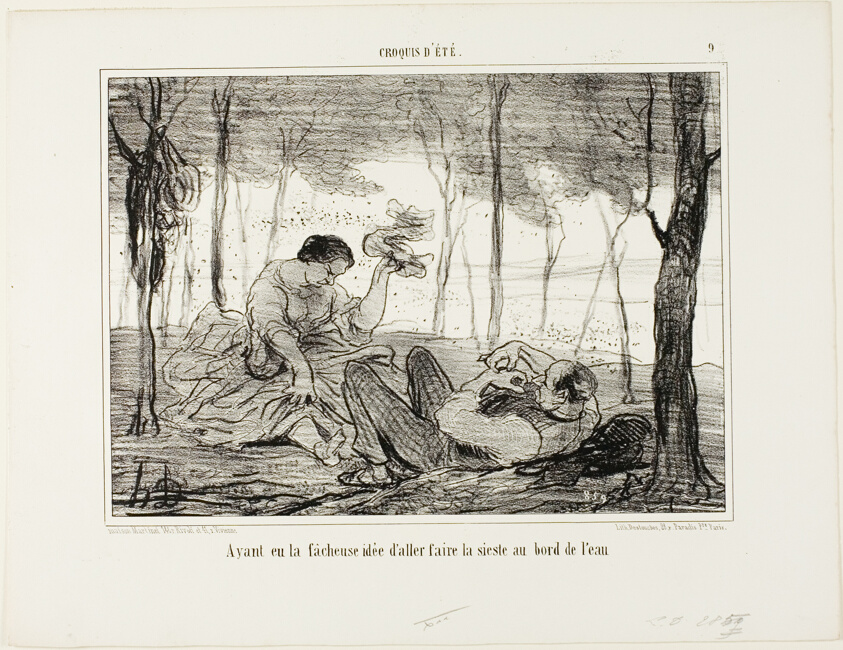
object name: Print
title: Having had the unfortunate idea to go take a nap at the water's edge, plate 9 from Croquis D'été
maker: Honoré Victorin Daumier; French, 1808-1879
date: 1856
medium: Lithograph in black on white wove paper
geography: France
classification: lithograph; print; prints and drawing